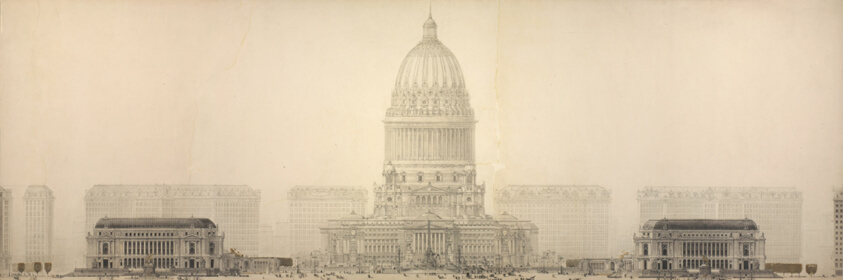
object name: Architectural Drawing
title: Plate 131 from The Plan of Chicago, 1909: Chicago. Elevation Showing the Group of Buildings Constituting the Proposed Civic Center.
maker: Daniel Hudson Burnham, American, 1846-1912; Edward Herbert Bennett, American, born England, 1874-1954; Fernand Janin, delineator, French, 1880-1912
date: 1909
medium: Ink on paper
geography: Chicago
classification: ink; architectural drawing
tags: Chicago, architecture, architectural drawing, boulevards, buildings, dome, drawing, elevation, illinois, metropolis, monuments, pool, public square